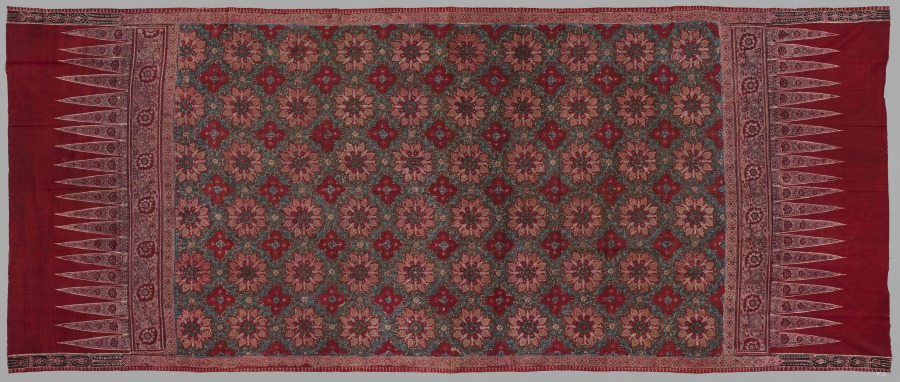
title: Hip Wrapper (tapis)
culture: India, Coromandel Coast, 1st half 19th Century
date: 1800–1850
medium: cotton; plain weave; block printed, drawn resist, painted mordants, dyed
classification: Textile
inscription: inked "Wanibu", Sumatra family name; "L" embroidered in plain weave